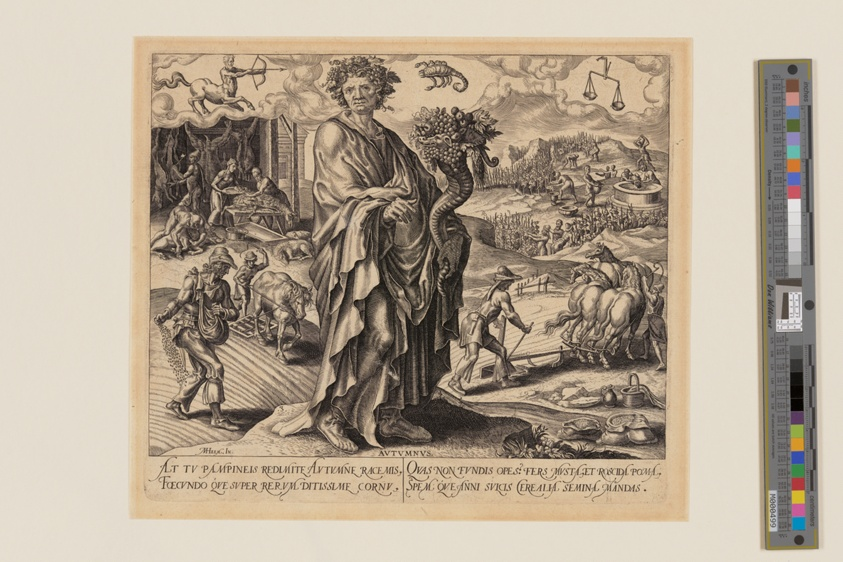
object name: Print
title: Autumn, from The Four Seasons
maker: Philips Galle (Flemish, 1537-1612); after Maerten van Heemskerck (Dutch, 1498–1574)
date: 1563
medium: Engraving on ivory laid paper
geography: Flanders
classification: engraving; paper; print; prints and drawing